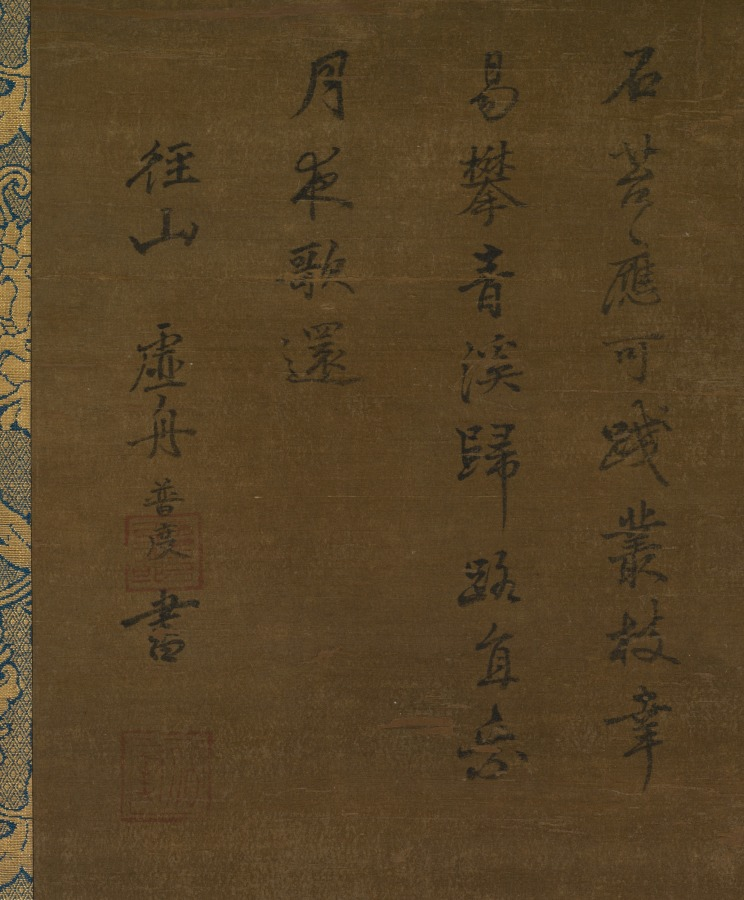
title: Landscape with Woodcutters Returning Home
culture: China, Southern Song dynasty (1127-1279)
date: 1200s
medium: hanging scroll, ink on silk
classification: Painting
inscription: inscribed by Xuzhou Pudu 虛舟普度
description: In late Song dynasty Chinese Chan Buddhist temples, paintings of landscapes, animals, or plants frequently took the place of deities. This hanging scroll features the humble life of woodcutters in nature an is in keeping with the Chan emphasis on simplicity and on the spiritual benefits of manual labor. executed in broad, quickly applied washes and punctuated by dark dots and texture strokes, the work is inscribed by Xuzhou Pudu, a priest at Wanshou temple near the Southern Song capital at Lin'an (modern Hangzhou).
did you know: A landscape with identical measurements in a Japanese private collection is also inscribed by Xuzhou. They may have been a pair of flanking scrolls in a triptych.